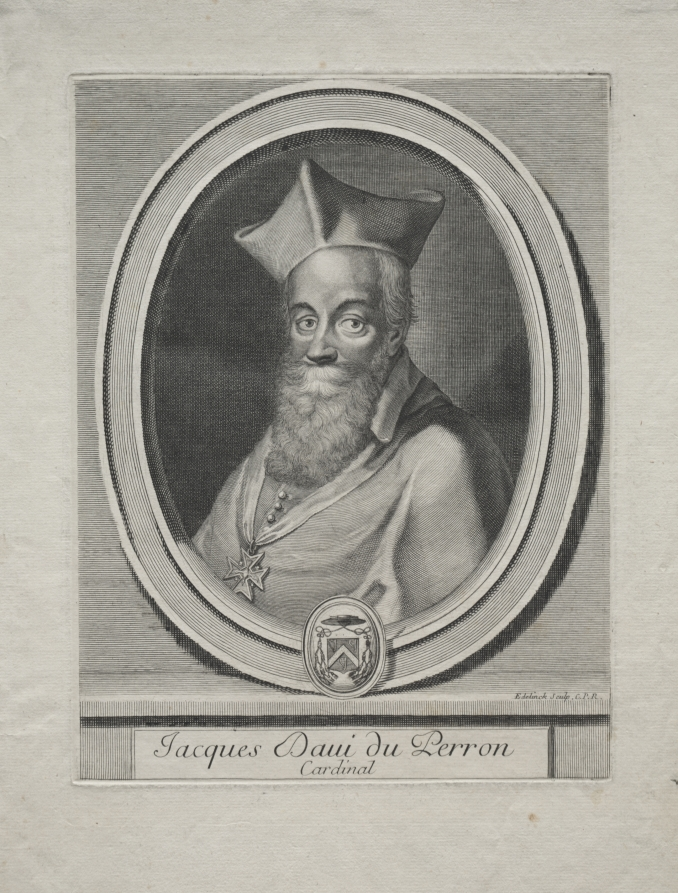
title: Cardinal Jaques Davey Duperron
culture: France, 17th century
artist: Gerard Edelinck (French, 1640–1707)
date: c. 1680–1700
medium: engraving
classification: Print